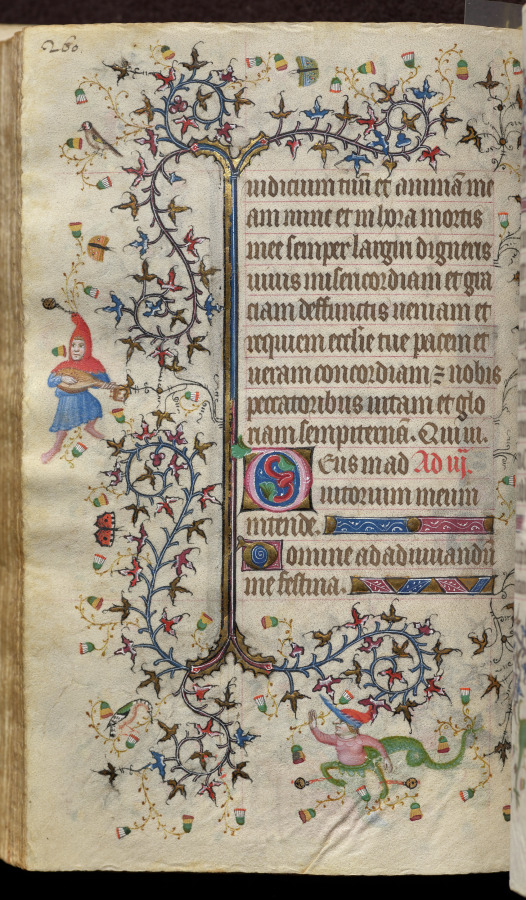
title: Hours of Charles the Noble, King of Navarre (1361-1425): fol. 130v, Text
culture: France, Paris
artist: Master of the Brussels Initials and Associates (French)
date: c. 1405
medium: ink, tempera, and gold on vellum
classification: Bound Volume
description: This precious volume was obviously highly prized by its owner, the French-born King of Navarre, who had his coat of arms painted on no less than twenty folios. Rather than directly commissioning this manuscript from a specific workshop, it seems that Charles the Noble acquired his book of hours -- perhaps ready-made for the luxury market -- while on a trip to Paris in 1404-05. A collaborative effort, six painting styles are evidenced within the pages of this codex, those of two Italians, two Frenchmen, and two Netherlanders. The painter who was responsible for the planning and decoration of the book, and who produced seventeen of the large miniatures, was a Bolognese artist known as the Master of the Brussels Initials. His principal assistant, responsible for most of the borders, was a Florentine who signed his name "Zecho" da Firenze on folio 208 verso.